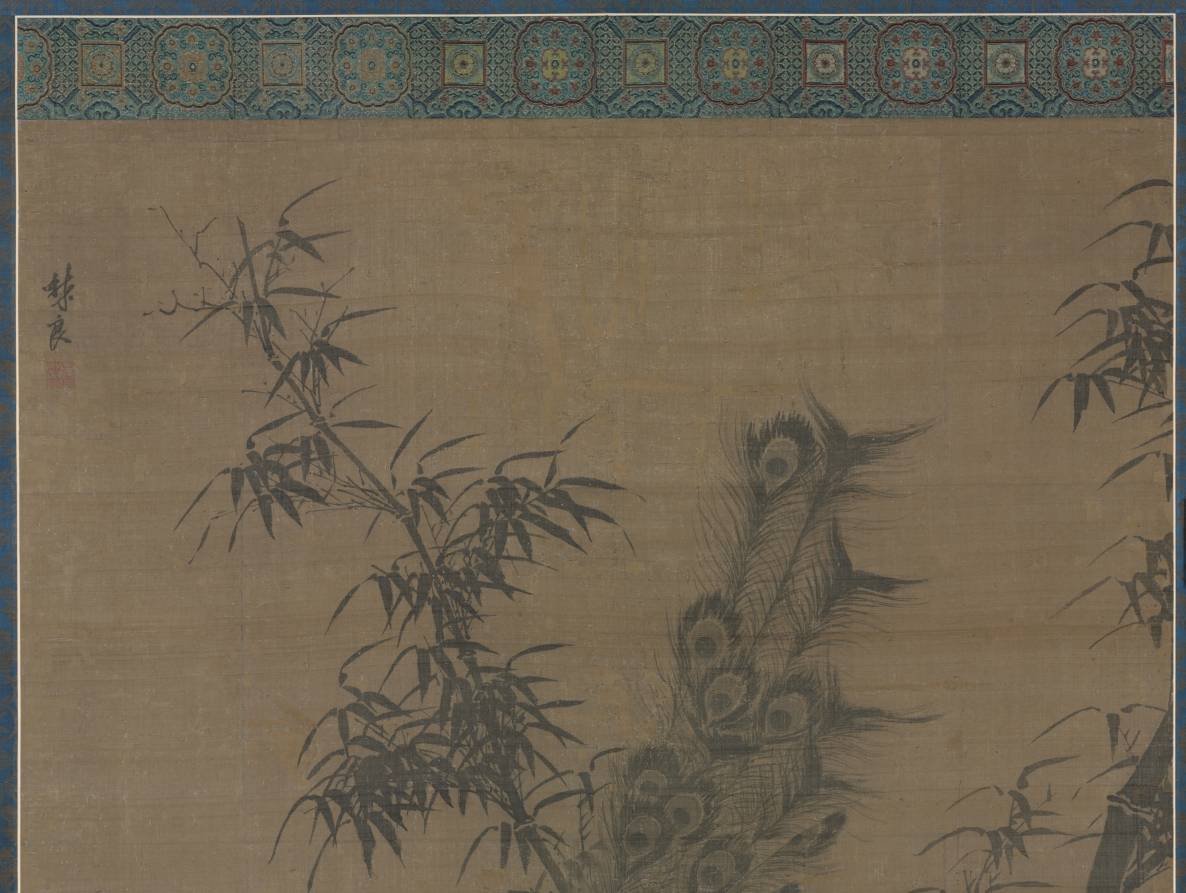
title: A Pair of Peafowl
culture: China, Ming dynasty (1368–1644)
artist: Lin Liang (Chinese, 1416–1480)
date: late 1400s-early 1500s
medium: hanging scroll, ink on silk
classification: Painting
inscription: 林良. [印] 以善圖書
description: The peacock, identified by the flamboyant tail, is paired with a female peahen to its right. In lowering her head, the hen seems to show respect to the male peacock. With his articulate brushstrokes and strong contrasting tones, Lin Liang’s representation in black ink appears as vivid as Yin Hong’s colorful peacock (1974.31). The painter skillfully uses wet and dry ink as well as broad and thin washes to represent the plumage of the bird. The surface of the rocks, depicted in powerful sweeping strokes, recalls the landscape painting style of the Zhe School, which specialized in expressive brushwork.